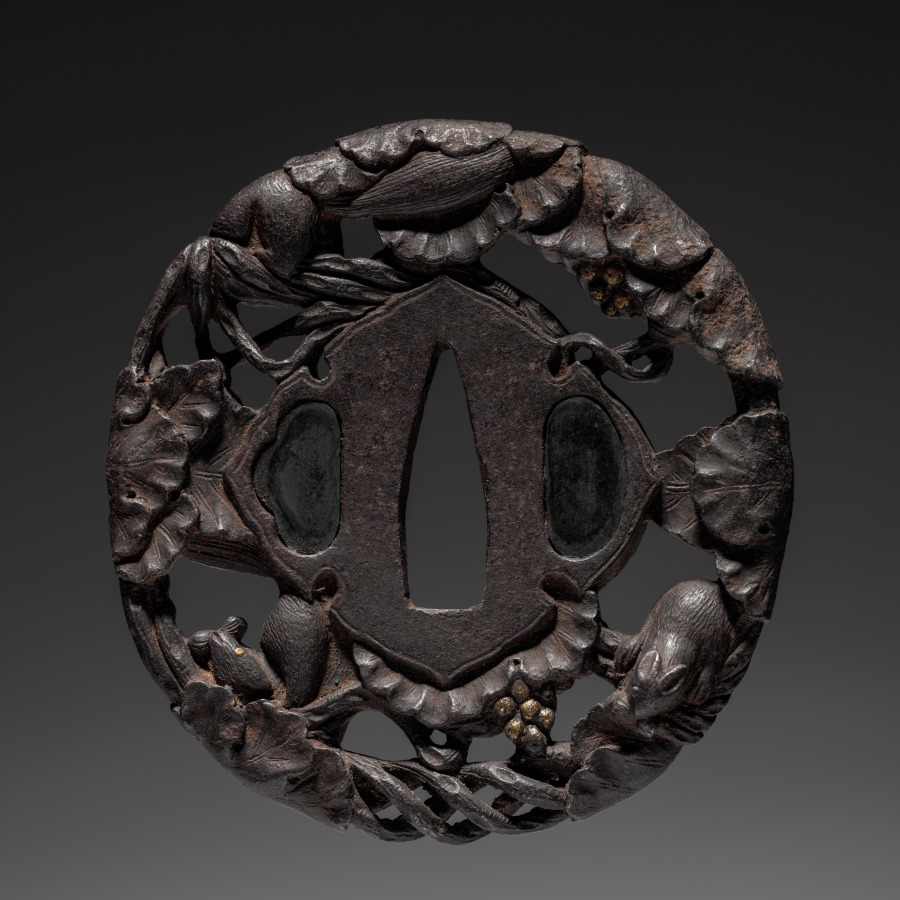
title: Sword Guard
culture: Japan, Edo period (1615–1868)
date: early 1800s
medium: iron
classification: Arms and Armor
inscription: Signature: Kanemitsu, residing at Sumidagawa, made